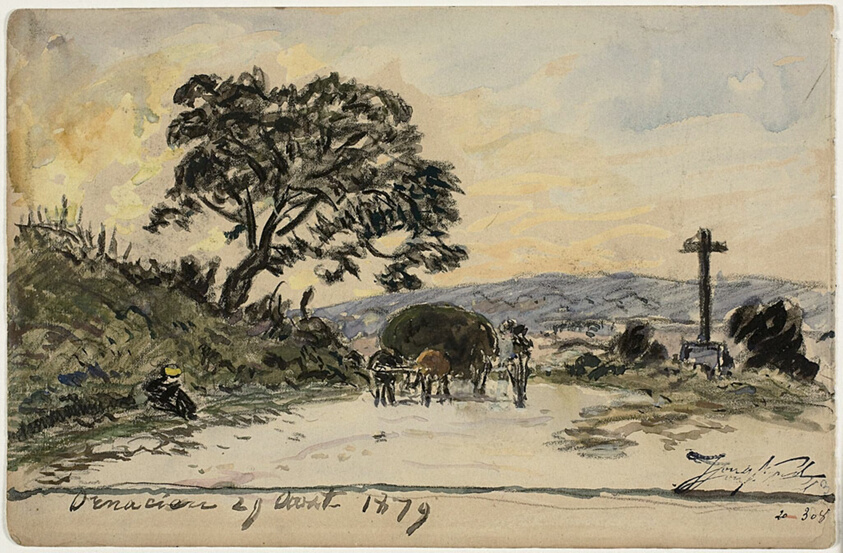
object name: Drawing and Watercolor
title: Ornacieux (recto and verso)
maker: Johan Barthold Jongkind (Dutch, 1819-1891)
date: 1879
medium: Watercolor and gouache, with black chalk (recto), and black chalk off-set (verso), on cream wove paper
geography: Holland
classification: watercolor; drawings (visual works); prints and drawing